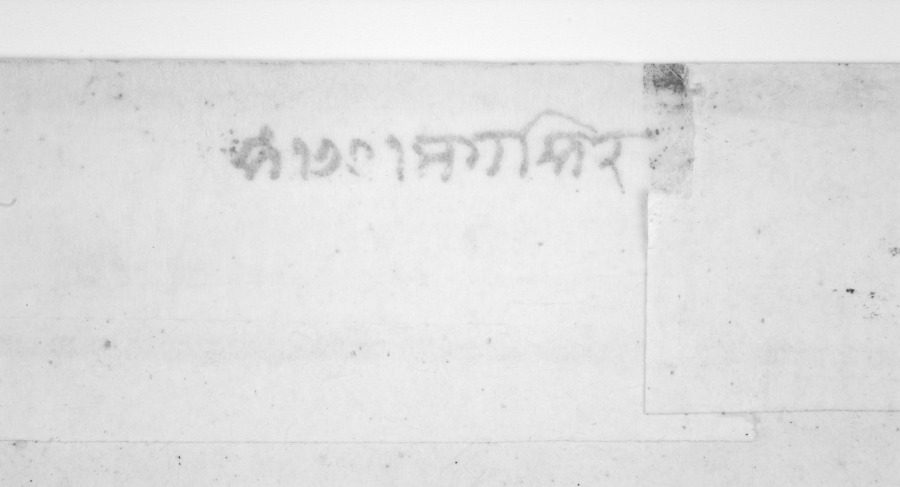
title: The Heroine Who Waits Anxiously for Her Absent Lover: Utka Nayika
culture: Northern India, Pahari kingdoms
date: c. 1734–50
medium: Gum tempera and gold on paper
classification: Painting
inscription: Verso: light drawing in brown ink of a standing lady; traces of part of a purple stamp with the word "Bikaner" visible.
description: The Sanskrit term nayika is typically translated as heroine, but more precisely a nayika is an idealized woman associated with various aspects of love, embodying a wide range of emotional and psychological states. Numerous literary works composed in India since at least the first century describe and categorize different types of nayikas. This utka nayika stands in glowing orange and gold in the night, waiting for her lover to arrive. Her demeanor is quiet and resolved. Her gesture indicates wonder, possibly that the clouds may be passing, and the moon may emerge to brighten the scene. She may also be astonished at her own perseverance and how she no longer feels the fear and agitation of the darkness and the solitude.